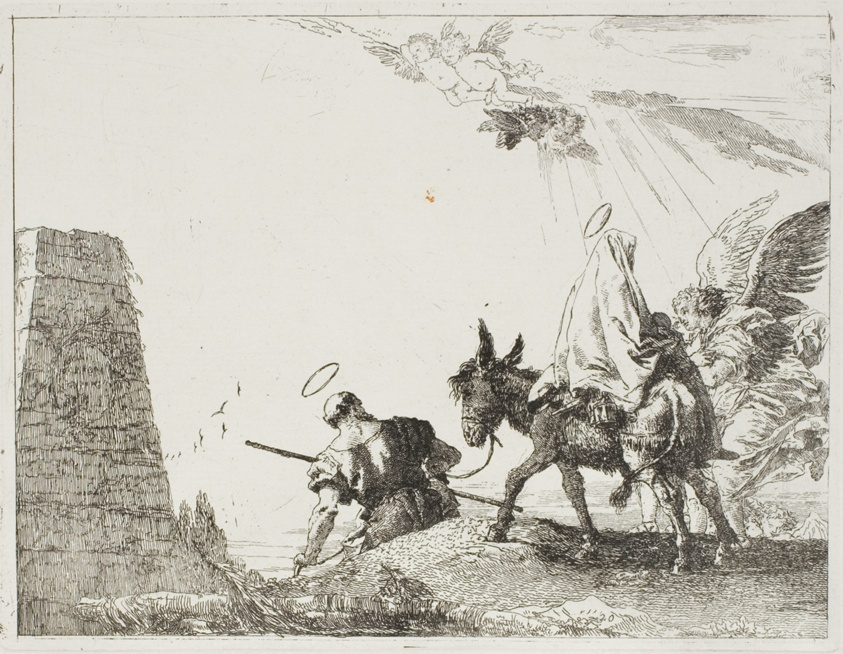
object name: Print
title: The Holy Family Passing by a Pyramid, plate twenty from The Flight into Egypt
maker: Giovanni Domenico Tiepolo (Italian, 1727-1804)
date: published 1753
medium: Etching on paper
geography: Italy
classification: etching; print; prints and drawing